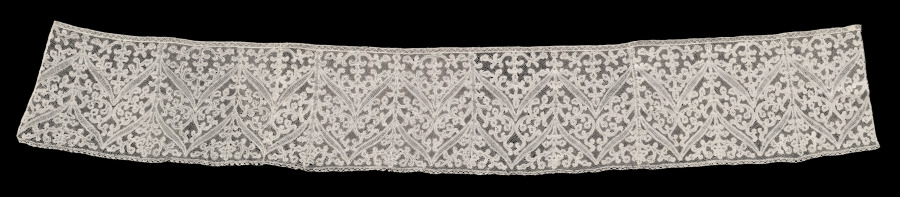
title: Lace Flounce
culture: Italy, Milan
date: 1700s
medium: Linen: bobbin lace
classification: Lace